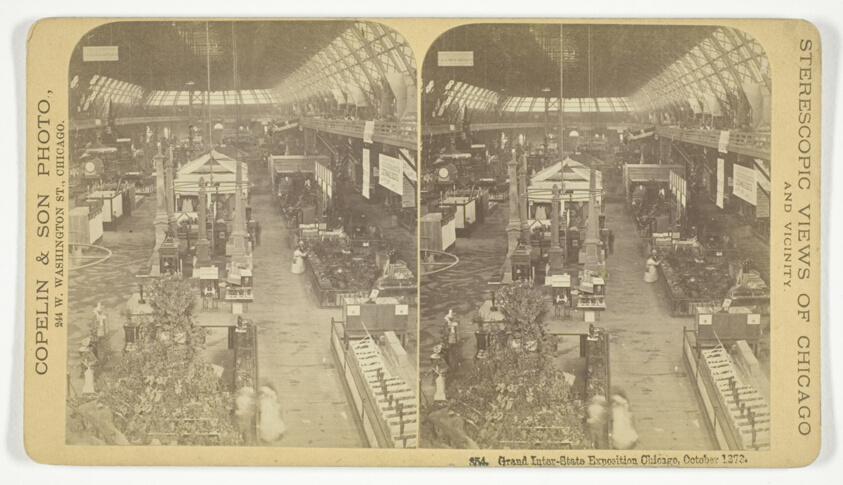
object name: Photograph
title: Grand Inter-State Exposition, Chicago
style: 19th century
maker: Copelin and Son (American, active late 19th century)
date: October 1873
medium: Gelatin silver prints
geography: United States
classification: photography; photograph